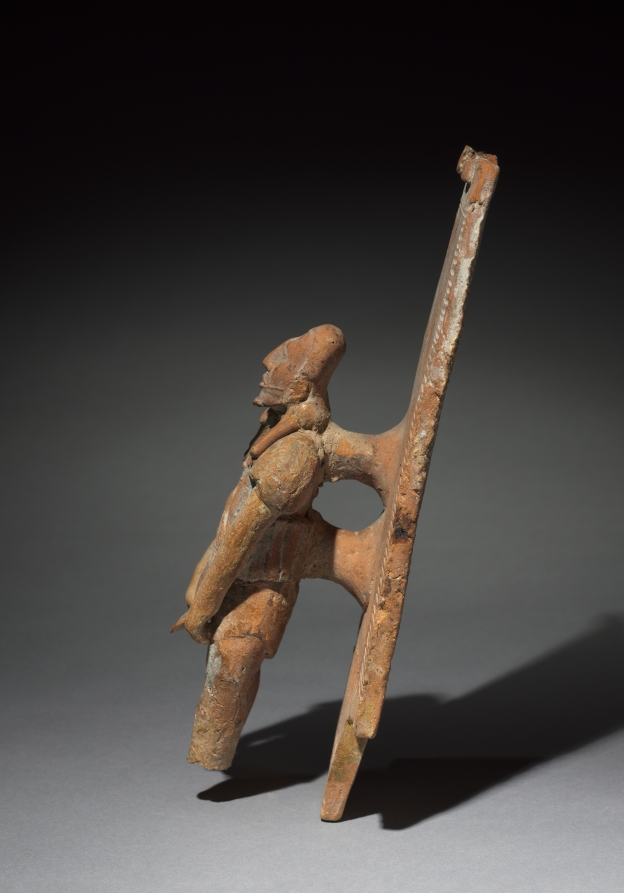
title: Figurine with Back Rack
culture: Mexico, Maya, Jaina style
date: 300–900 CE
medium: molded and modeled pottery with traces of pigment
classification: Sculpture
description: Maya figurines—made by hand, with molds, or sometimes a combination of the two techniques—represent a wide range of human, animals, and supernatural beings. This example is a male with an enormous backrack, an article of ceremonial attire worn by dancers and other courtly personnel. Figurines have been found in tombs and offerings but also in household contexts.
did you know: Figurines from Jaina, an elite Maya burial ground, served as companions for the dead.